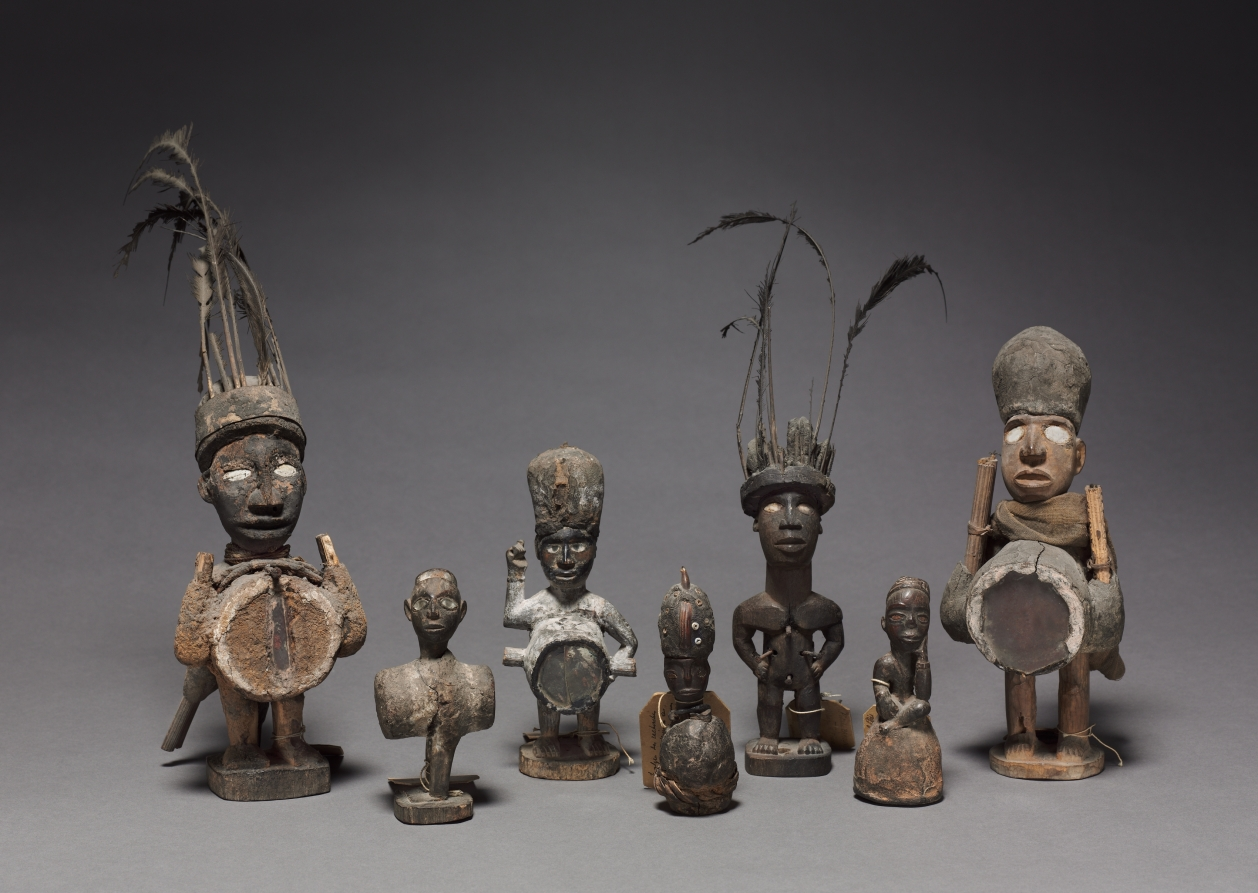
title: Power figure (nkisi)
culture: Central Africa, Republic of the Congo, Kongo people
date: late 1800s-early 1900s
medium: Wood, organic materials (including resin), probably kaolin, and metalized glass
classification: Sculpture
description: This figure is of the nduda type, characterized by the attached "guns" loaded with gunpowder and used to shoot witches. It is the only figure that adopts the threatening pose: the right hand raised, holding a spear or knife, and the left hand resting on the hip. Two guns protrude horizontally on both sides of the cylindrical medicine pack on the belly, covered with a round piece of mirror.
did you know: This is the only figure in a group of seven found in a French antique shop adopting a threatening pose.